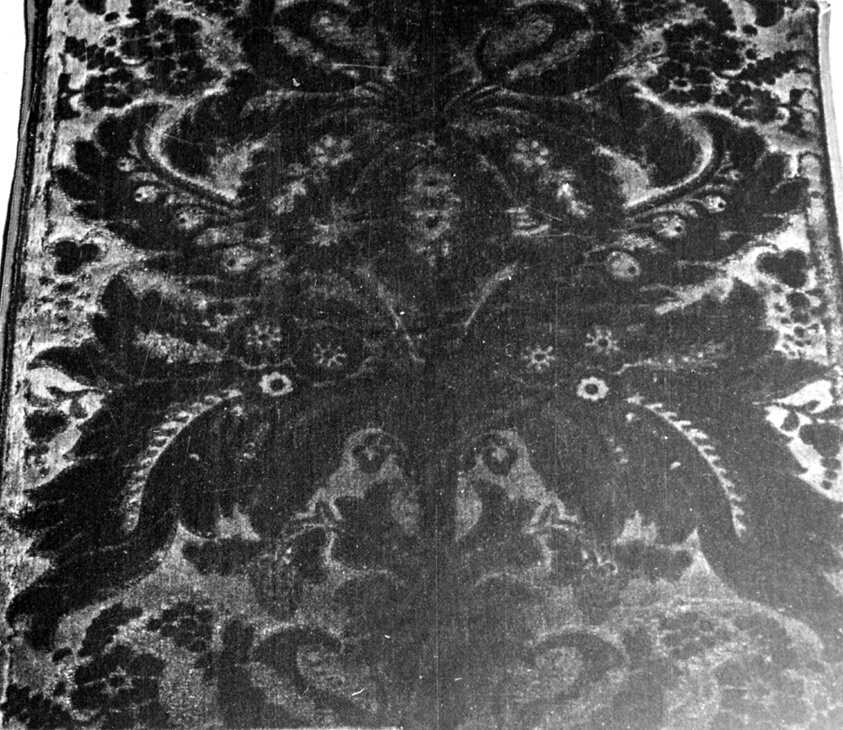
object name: Textile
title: Utrecht Velvet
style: Arts and Crafts Movement, british, 19th century, British Arts and Crafts Movement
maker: Attributed to William Morris (English, 1834–1896); Produced by Morris & Co., London (English, 1875–1940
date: Design c. 1871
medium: Velvet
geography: England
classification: textile; weaving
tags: foliage, botanical, floral